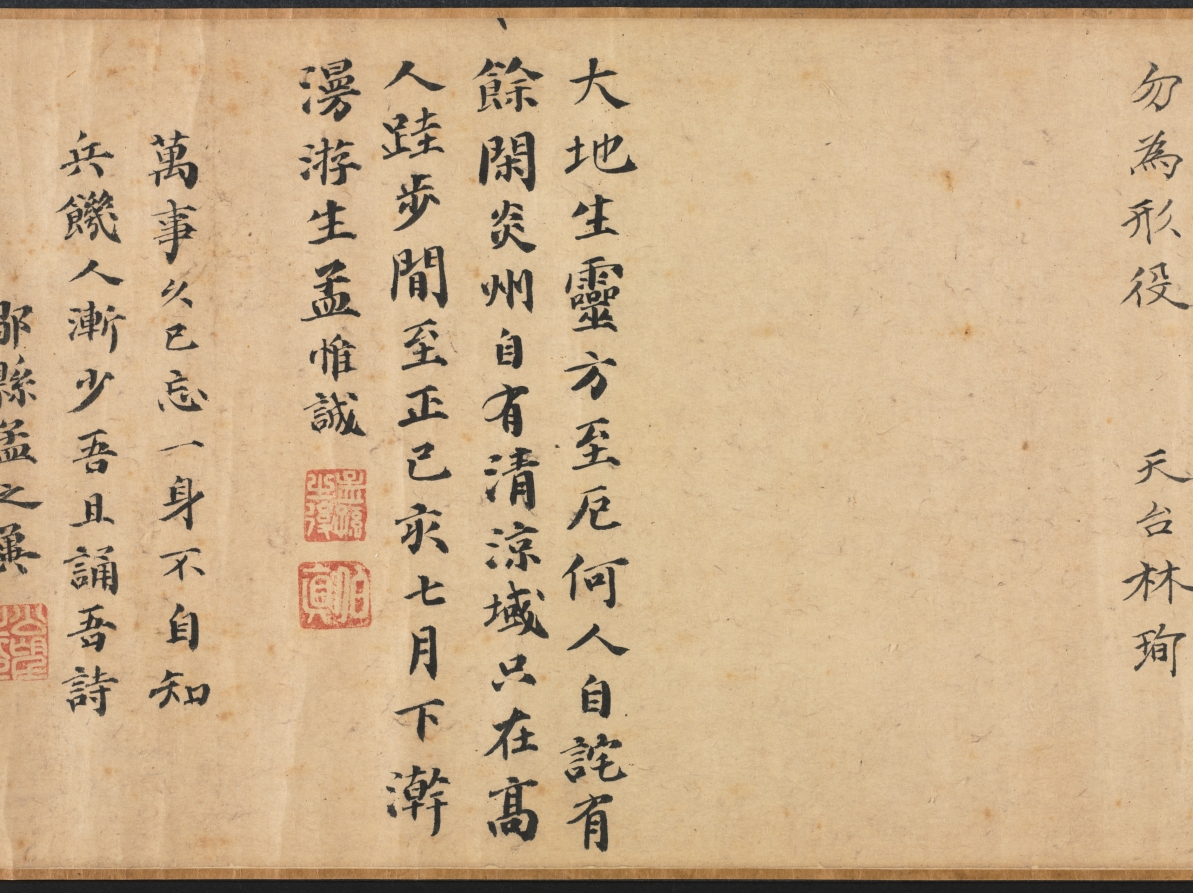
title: Leisure Enough to Spare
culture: China, Yuan dynasty (1271-1368)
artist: Yao Tingmei (Chinese, active mid-1300s)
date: 1360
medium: handscroll, ink on paper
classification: Painting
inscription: 至正廿年春正月_日作此併系鄙語于尾 地偏人遠閉柴關，滿院松陰白晝閒。 眼底風塵渾忘却，坐看流水臥看山。 吳興姚廷美畫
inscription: 23 colophons and 53 seals (dates unavailable for some): 1 colophon, dated 1360, and 2 seals of Yang Weizhen (1296-1370); 1 colophon and 3 seals of Wan Yi; 1 colophon of Zhang Junde; 1 colophon and 3 seals of Angji (act. ca. mid-14th c.); 1 colophon and 1 seal of Xu Shiquan; 1 colophon and 3 seals of Gao Yu; 1 colophon and 2 seals of Li Mingfu; 1 colophon and 2 seals of Lu Lin; 1 colophon and 1 seal of Zhang Qian; 1 colophon of Tao Tangwen; 1 colophon and 1 seal of Wu Yuangui (act. ca. 1300-60); 1 colophon of Bao Jiong; 1 colophon of Wang Zao; 1 colophon and 1 seal of Ma Chuyi; 1 colophon and 1 seal of Lin Yizhuang; 1 colophon and 1 seal of Gu Shunju; 1 colophon and 2 seals of Wang Jing; 1 colophon and 2 seals of Lin Shouchang; 1 colophon and 1 seal of Gao Zhidao; 1 colophon of Lin Xun; 1 colophon, dated 1359, and 2 seals of Meng Weicheng (act. mid-14th c.); 1 colophon and 1 seal of Meng Zhiji (act. mid-l4th c.); 14 seals of Liang Qingbiao 梁清標 (1620-1691); 1 poem dated 1755 and 5 seals of the Qianlong 乾隆 emperor (r. 1736-95); 2 seals of the Jiaqing 嘉慶 emperor (r. 1796-1821); 3 seals of the Xuantong 宣統 emperor (r. 1909-11).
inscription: Title on frontispiece by Zhang Bi 章弼: Signed Gongchen 拱辰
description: Seclusion and leisure—the ideals of the literati, or scholar-gentlemen—are expressed in this mature work by Yao Tingmei. The theme acquired special meaning at a time of the military uprisings near the end of the Yuan dynasty. Dedicated to an ascetic named Du, this work combines painting, calligraphy, and poetry; following the painting are more than 20 poems and essays written by notable scholars, one of whom was the calligrapher Yang Weizhen. It reveals not only the aesthetic taste of the literati but also the practice of contributing artistic and literary works to fulfill social obligations. Yao's painting demonstrates his individual style derived from various ancient masters (Guo Xi, Dong Yuan, and Juran). Yang Weizhen's calligraphy exhibits his bold, vigorous style and his intent to capture the spirit of antiquity in art.